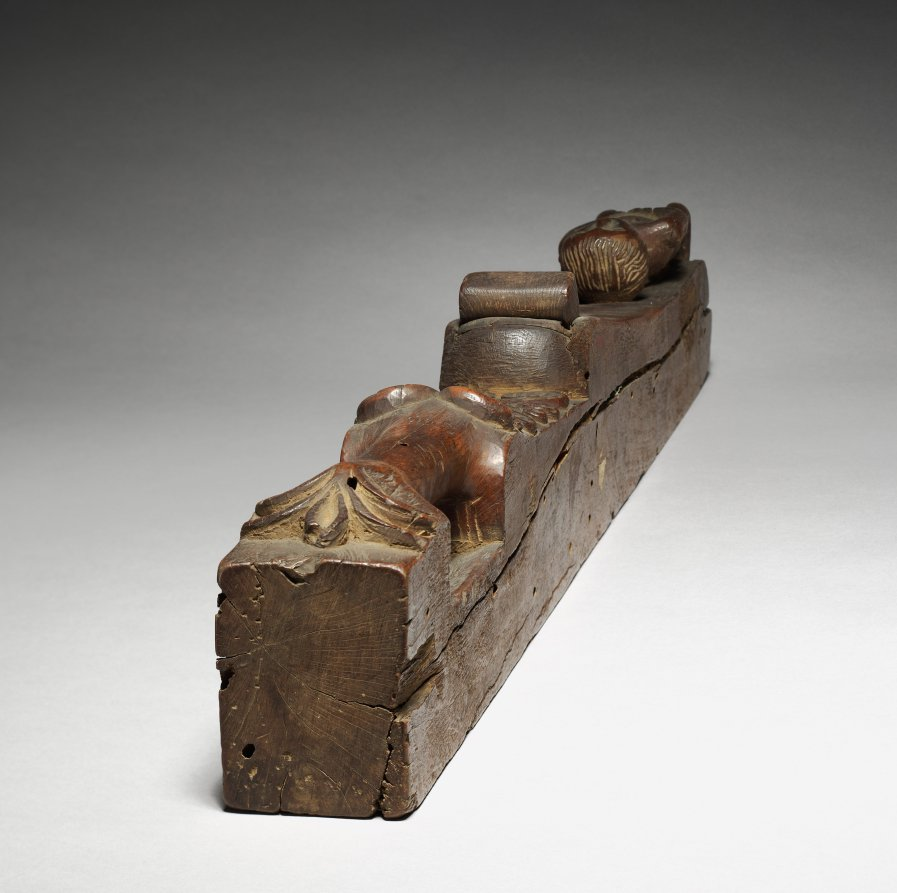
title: Plane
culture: Germany or Italy, 17th century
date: 1600s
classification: Tool